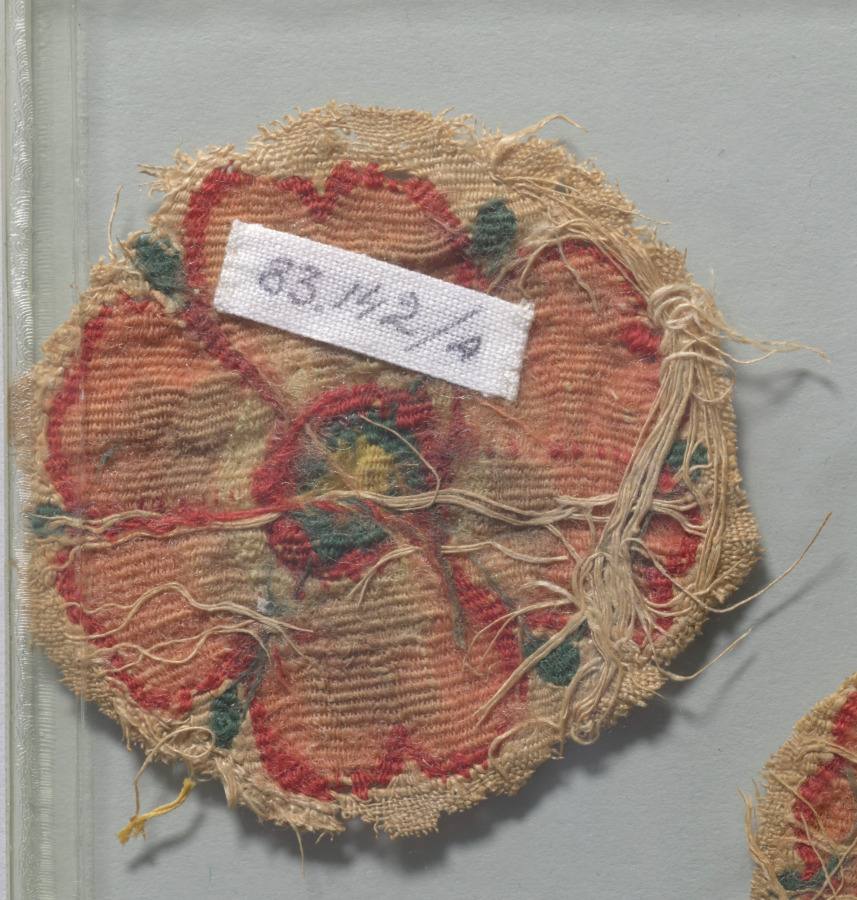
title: Fragments from a Curtain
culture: Egypt, Byzantine period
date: 300s–500s CE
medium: tapestry (originally inwoven in tabby ground, applied to plain tabby linen); linen and wool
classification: Textile